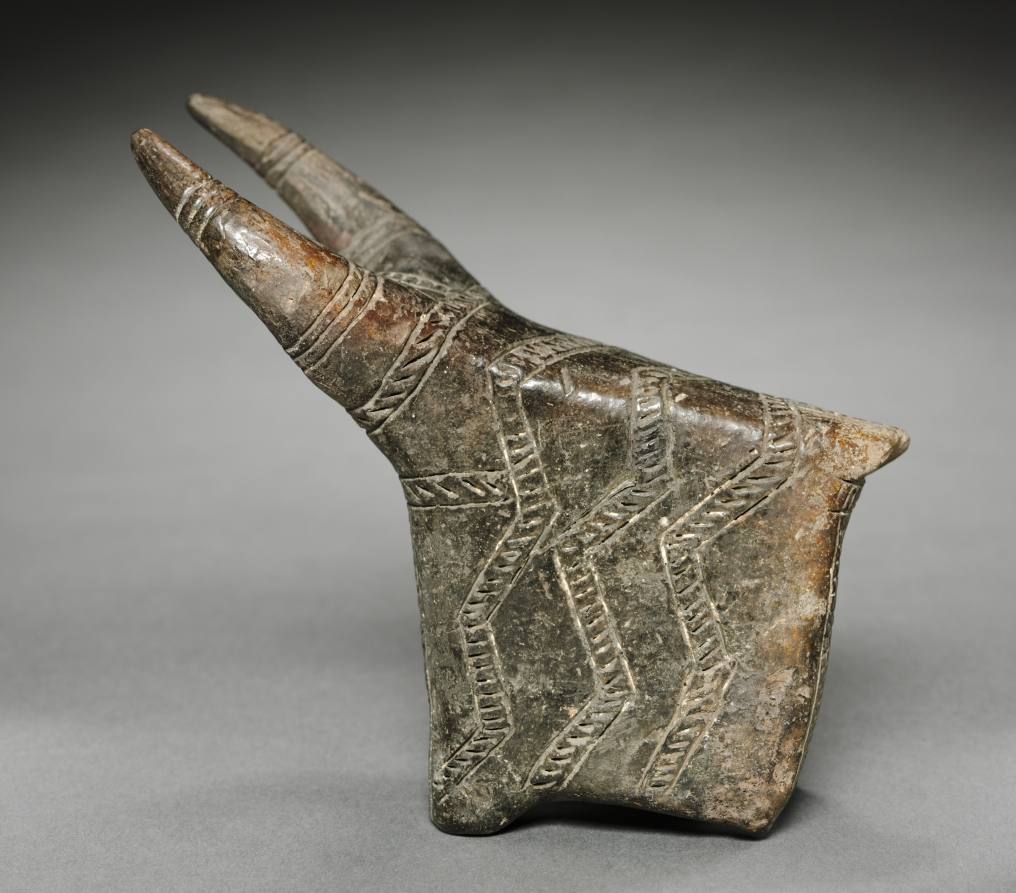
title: Bull Protome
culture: Cyprus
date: 2000–1000 BCE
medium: terracotta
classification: Ceramic